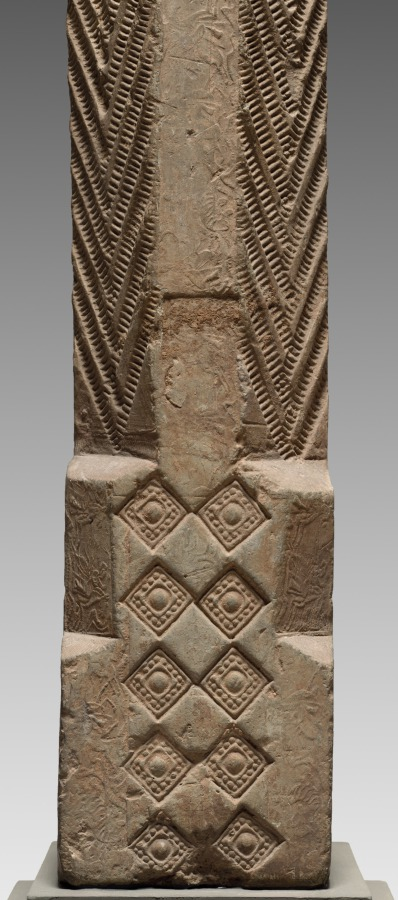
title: Hollow Tile: Column from Tomb-Chamber Doorway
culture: China, Han dynasty (202 BCE–220 CE)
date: 100–200 CE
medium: earthenware, die-stamped relief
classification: Ceramic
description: Striding tigers (top), racing horsemen (right column), and reverent officials (left column) are stamped into the surface of this underground portal to a tomb. The doorway preserves in stone the post-and-lintel structure, a basic element of Chinese wooden architecture. By the first century CE, a revolution in Chinese tomb construction and furnishing had taken place. Tombs lined with decorated bricks and tiles replace the earlier tombs constructed with only rammed-earth walls. Ceramic surrogates or models of stoves, houses, servants, and pets filled these more durable chambers, symbolically extending the creature comforts of this world into the world after death.